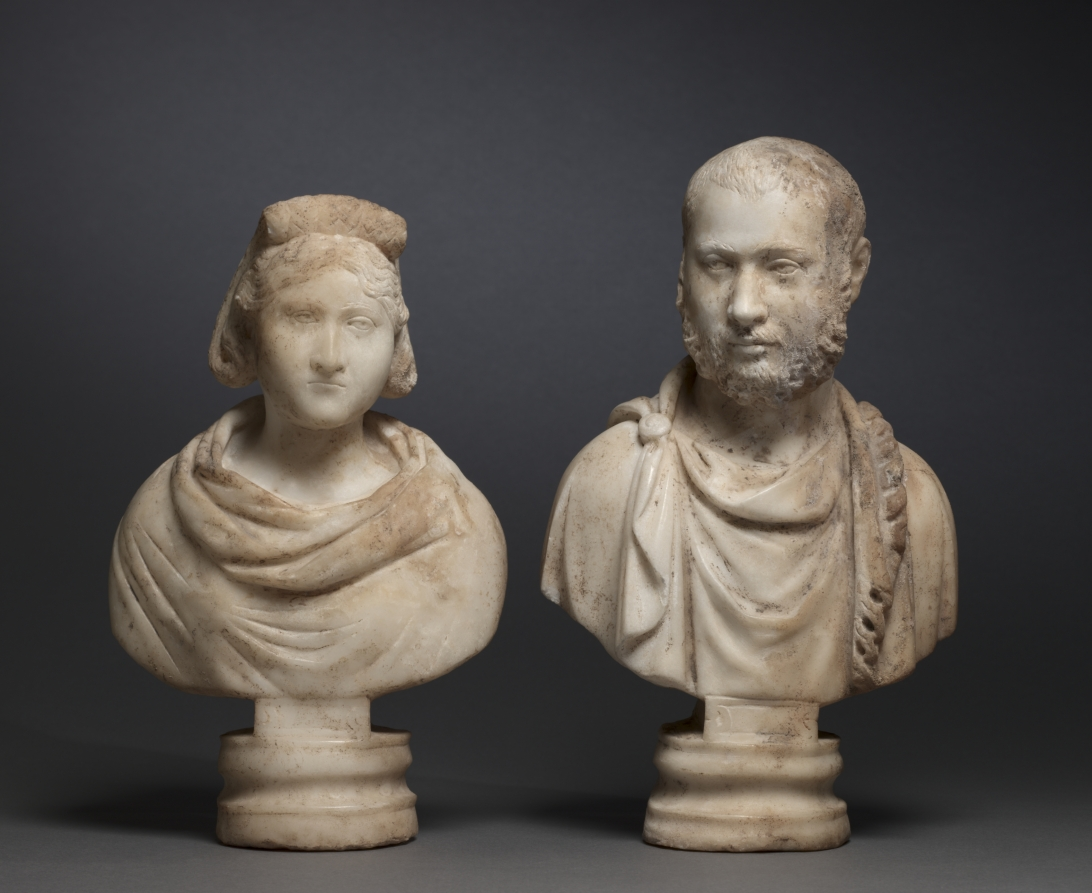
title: Portrait Bust of an Aristocratic Man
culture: Anatolia, late Roman-early Christian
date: 280–90 CE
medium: marble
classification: Sculpture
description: These busts are thought to have been unearthed with the Good Shepherd and Jonah sculptures. The nearly identical facial characteristics of each sitter-three males and three females-suggest that the same man and woman was represented three times. Although the intended function of the busts remains unknown, they probably represent a husband and wife. The portraits have been dated stylistically, as well as by costume and hairstyle, to the 270s ad. One of the men wears a paludamentum, or fringed cloak. One of the women wears a decorative stole, an attribute of rank probably conferred on her by her husband. The most distinctive feature of the female portraits is the hairstyle, a variation of the scheitzelkopf, in which the hair, after being combed behind the ears down to the nape of the neck, is braided, pulled up over the top of the head and folded under at the front. Careful study of the evolution of women's coiffures supports a date of 270 to 280 ad for the portraits, about the same as the symbolic sculptures of Jonah and the Good Shepherd. The rarity of intentionally paired portrait busts in late antiquity, especially those in a series, raises questions as to their original function. The busts may have been commemorative and intended for distribution as diplomatic gifts. It is likely that they were commissioned by a single, important patron or family to enhance their social or political status.